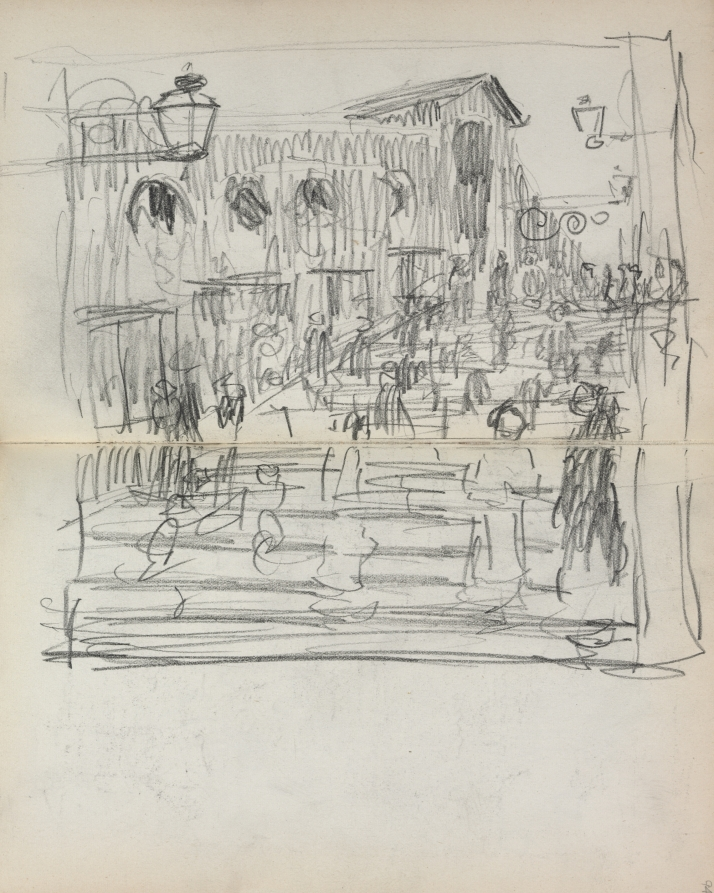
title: Italian Sketchbook: Bridge with Figures (page 93 & 94)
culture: America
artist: Maurice Prendergast (American, born Newfoundland [now Canada], 1858–1924)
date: 1898–1899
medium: pencil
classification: Bound Volume